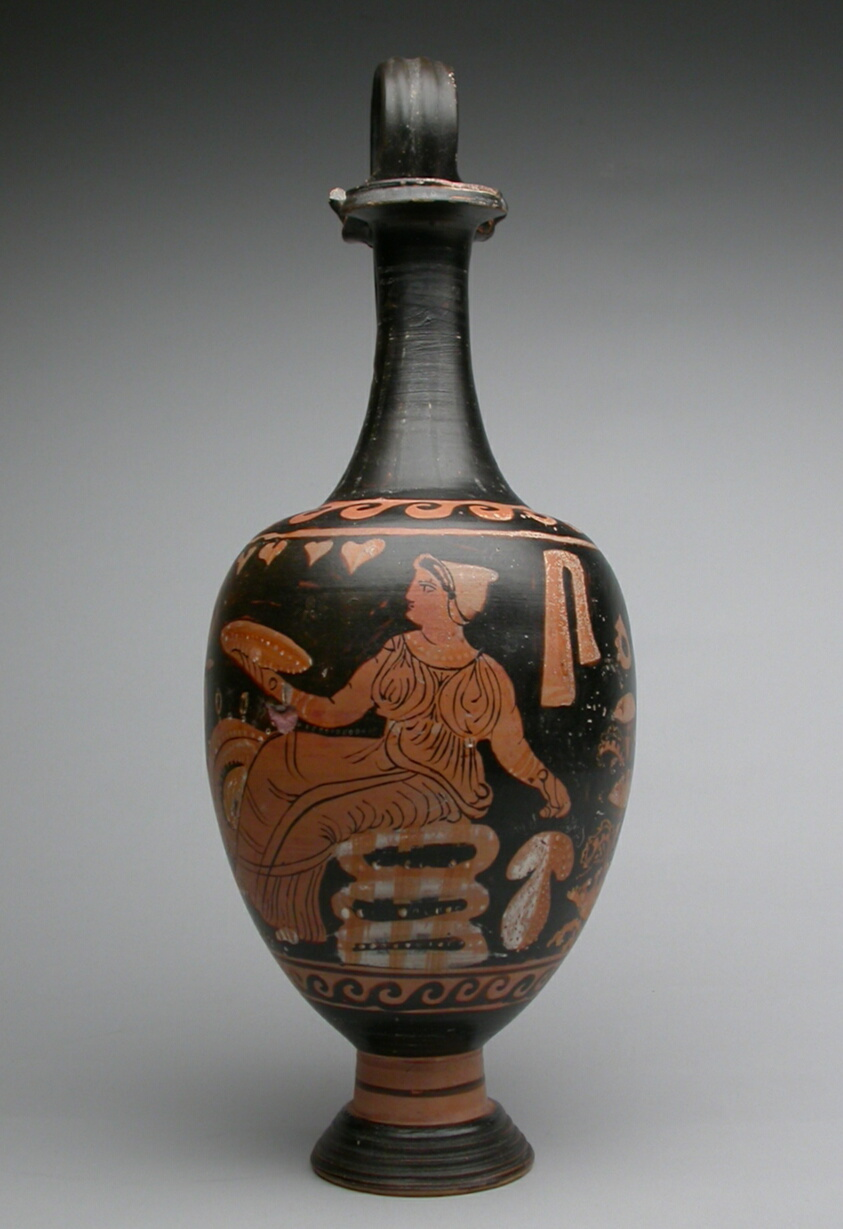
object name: Vessel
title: Oinochoe (Pitcher)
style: red-figure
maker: Attributed to the Mattinata Painter; Greek; Apulia, Italy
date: end of 4th century BCE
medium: terracotta, red-figure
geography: Greece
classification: pitcher (vessel); ceramics; vessel; ancient art